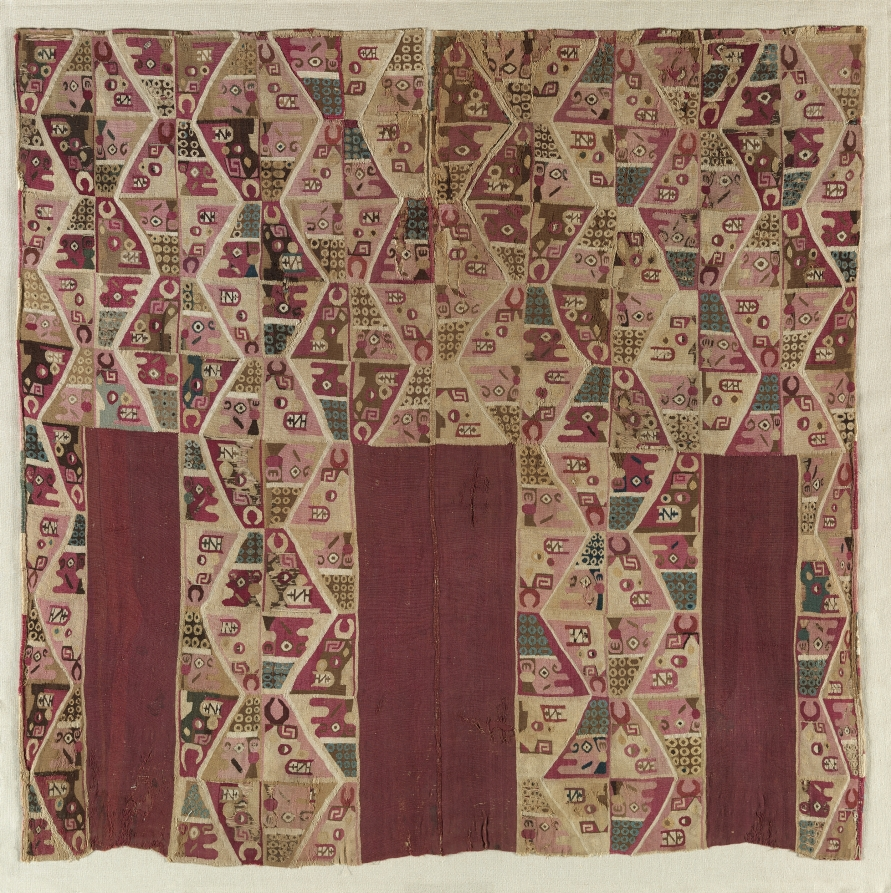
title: Tunic with Profile Animal and Human Heads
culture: Peru, South Coast, Wari Culture, Middle Horizon, 8th-12th Century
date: c. 700–1100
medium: tapestry weave: wool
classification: Textile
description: Wari tunics are made of two long panels folded at the shoulder line and stitched together at center and side seams, with openings left for the head and arms. The looms on which the panels were woven measured about 80 x 20 inches, with the warps spanning the short dimension. Thus, the warps are horizontal rather than vertical in the garment as it was worn. This orientation is unusual and seems to have influenced the construction of later Inca tunics. In this example, the imagery comprises two profile heads that alternate, one a human and the other an animal that may represent a deer or a bat. Such tunics were luxury goods worn only by privileged individuals.